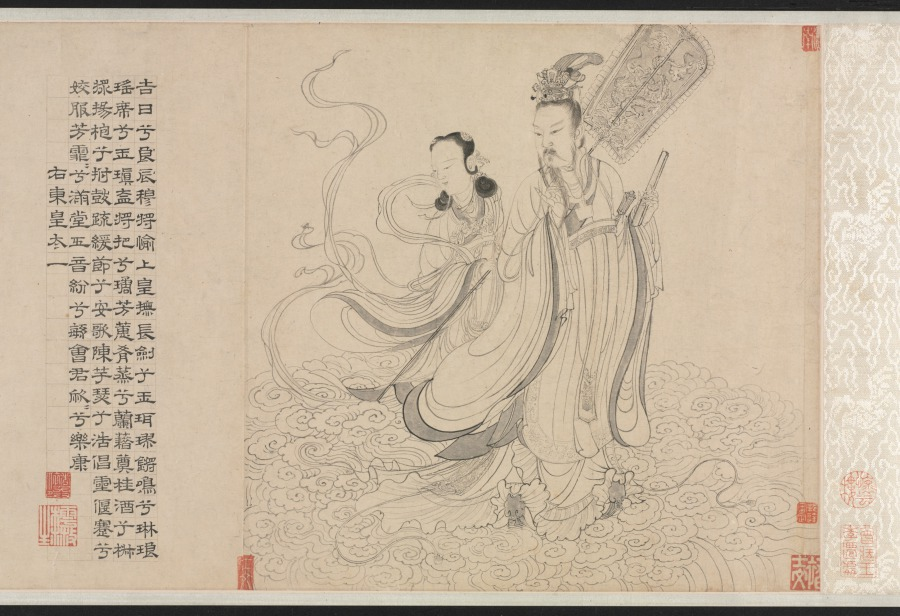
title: Nine Songs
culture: China, Yuan dynasty (1271-1368)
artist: Zhang Wo (Chinese, active c.1336–after 1364)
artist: Chu Huan (Chinese, active 1361)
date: 1361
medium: handscroll; ink on paper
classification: Painting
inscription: 7 colophons and 47 seals: 1 colophon, dated 1361, and 28 seals of Chu Huan 褚奐 (active c. 1361); 1 colophon, dated 1785, and 1 seal of Lu Shihua 陸時化 (1714-1779); 2 seals of Lu Yü-ch'ing (18th c.); 1 colophon, dated 1935, of Ye Gongchuo 葉恭綽 (1881-1968); 1 colophon, dated 1935, of Wu Hufan 吳湖帆(1894–1968); 1 colophon, dated 1938, and 1 seal of Wang Tongyu 王同愈 (1856-1941); 1 colophon, dated 1941, of Wu Huayuan 吳華源 (1893-1972); 1 colophon, dated 1942, and 9 seals of Xu Bangda 徐邦達 (1911–2012); 1 colophon, dated 1942, of Lang Jingshan 郎靜山 (1892-1995); 1 colophon, dated 1944, of Tang Yun 唐雲 (1910-1993); 6 seals of Wang Jiqian [C.C. Wang] 王季遷 (1907–2003).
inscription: Text of The Nine Songs written by Chu Huan at the end of each section.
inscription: 右離騷九歌圖，宋龍溟居士李公本，淮南張渥叔厚所畫妙絕當世。家藏請予書其辭目識于左。至正二十一年辛醜三月旦河南褚奐記。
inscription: Colophon by Lu Shihua 陸時化 (1714–1789): This scroll is fortunate to have been handed down from collections of the right people. Now, after 500 years, its condition is as good as when it was painted. I acquired this from Mr. Shen Guiyu [1673-1769], the President of the Board of Rites. The label is in his handwriting when he was 95 years old. I submit that Chu Huan (t. Shiwen) of the Yuan Dynasty was a native of Qiantang. His "seal" and li writings are in the style of Wu Rui. For example, in [Chu Kuei's] Ming ji lu [A list of masterpieces] is recorded the stele commemorating the restoration of the prefectural school of Kun-shan, the text of which was composed by Yang Weizhen in the twenty-first year of Zhizheng [1361]; and the calligraphy as well as the title in li style was by Chu Huan, who was at that time an assistant judge of the prefecture of Haining in the circuit of Hangzhou. Zhang Wo's zi is Shuhou (叔厚). His literary name is Zhen Qisheng (贞期生). According to [Gu Ying's] Yu shan cao tang ya jii, he liked to paint in the bai-miao or the "pure delineation" style after the method of Li Longmian [Li Gonglin 李公麟], which finds no peer among the ancient masters. This is agreed upon [by Pei Ch'iung] in his Qing jiang zhi who praised [Zhang Wo] as being quite learned and well-versed in many branches of the arts, especially figure painting. Recorded by Lu Shihua [The mountain dweller], listening to the pine, in the twelfth month of the yisi year [1785].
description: Painted in the baimiao, or fine-line drawing style, this ancient work demonstrates the literati’s use of abstract calligraphic brushwork for self-expression. The subject of the “Nine Songs”—songs associated with shamanistic rituals in the ancient Chu kingdom—had traditionally provided artists with myths and legends that they could explore and reinterpret in their own works.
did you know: Divided into eleven sections, the scroll contains illustrations by painter Zhang Wu followed by a transcription of the relevant verse by calligrapher Chu Huan.